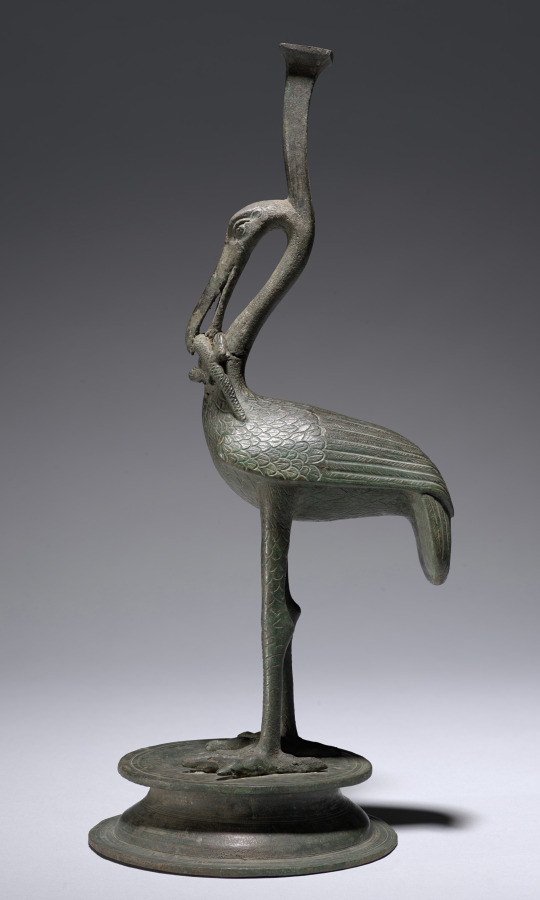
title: Ibis Eating a Lizard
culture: Italy, Rome, Roman Empire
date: 100 BCE–100 CE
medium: bronze, hollow cast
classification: Sculpture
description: The ibis is an Egyptian bird, shown here standing firmly on both legs with a lizard in its beak. The bird rests on a two-tiered circular base, and a vertical stem with incised decoration extends above the ibis’s head. While an Egyptian animal, the image of the ibis devouring a lizard became common only in the Roman world, depicted in wall paintings and seen on Barbotine ware, a type of pottery. This sculpture may be unique, however, in showing this motif in the round.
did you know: This sculpture was possibly used as a support for furniture, a candelabrum, or an incense burner.